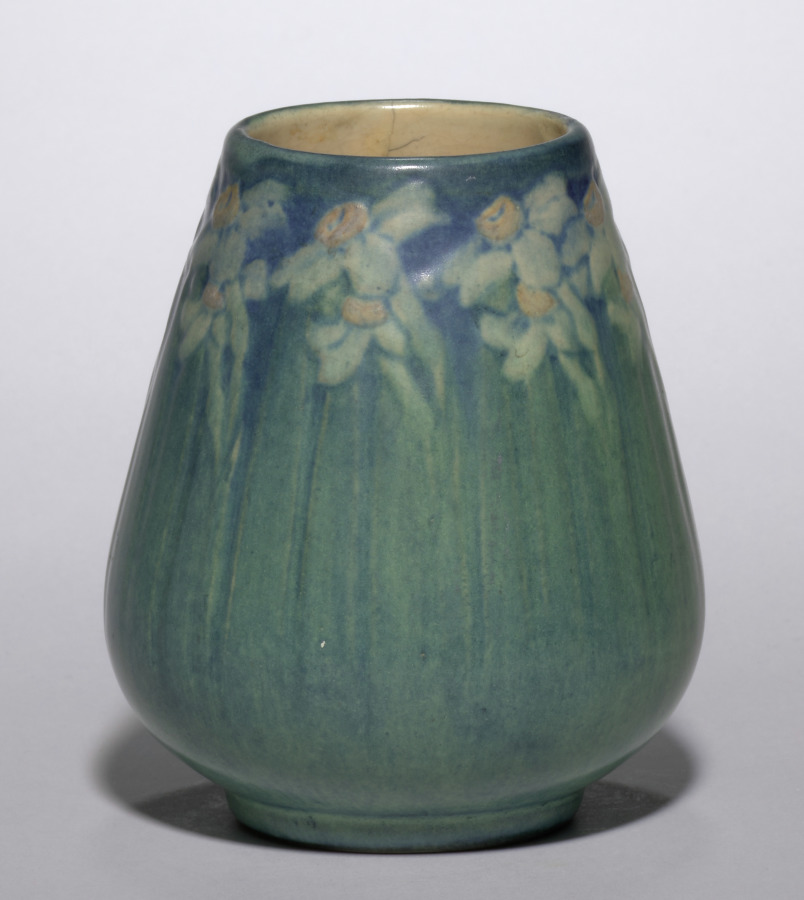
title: Vase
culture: America, Louisiana, New Orleans, 20th century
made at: Newcomb Pottery (American, 1895–1940)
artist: Henrietta Bailey (American, 1874–1950)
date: 1900s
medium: glazed ceramic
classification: Ceramic